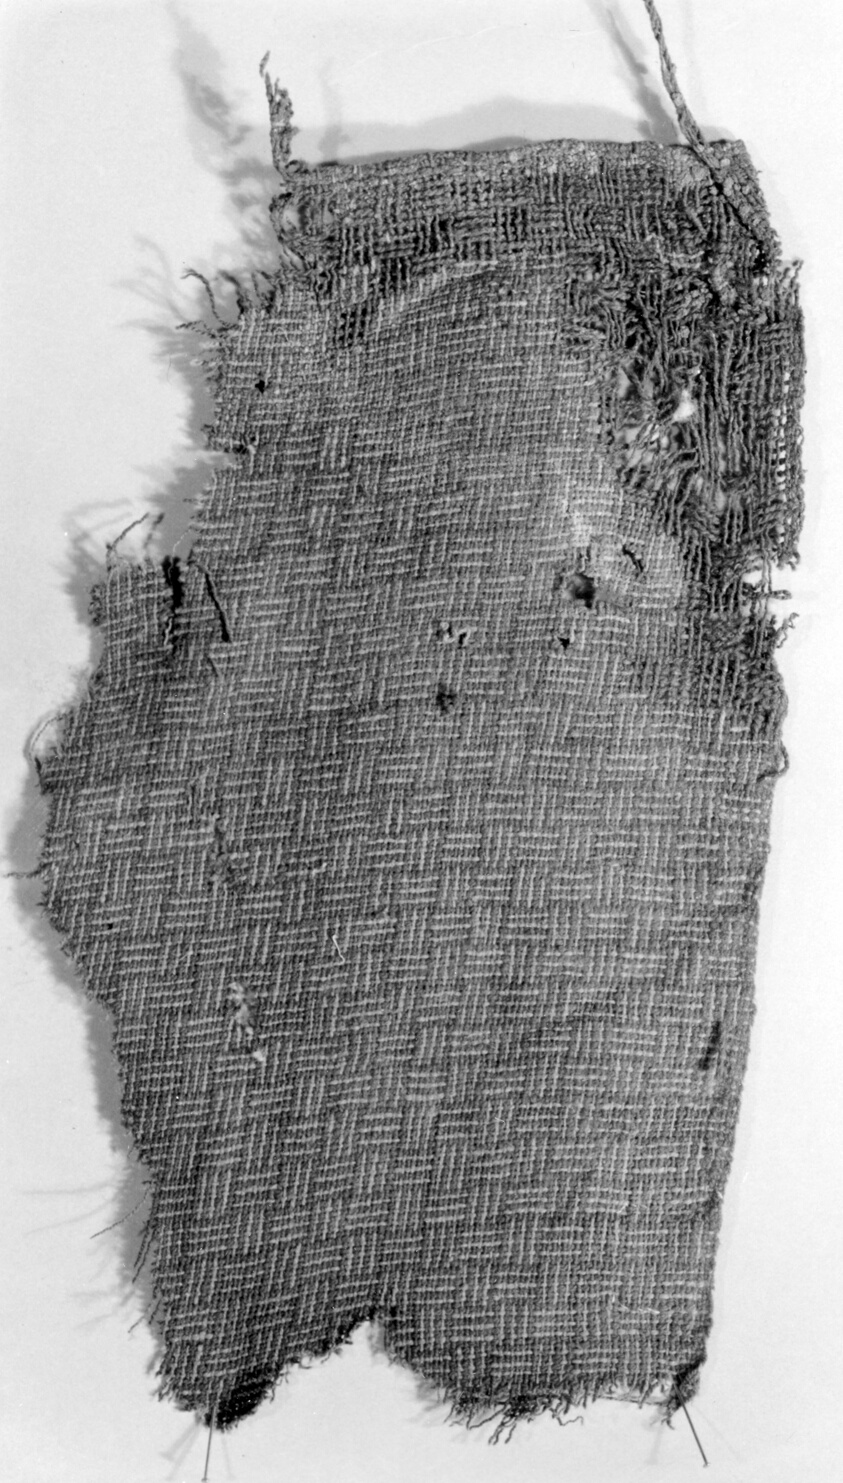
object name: Textile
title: Fragment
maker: Peru, south coast, Ica Valley, Cerro de la Cruz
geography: Peru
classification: textile; weaving